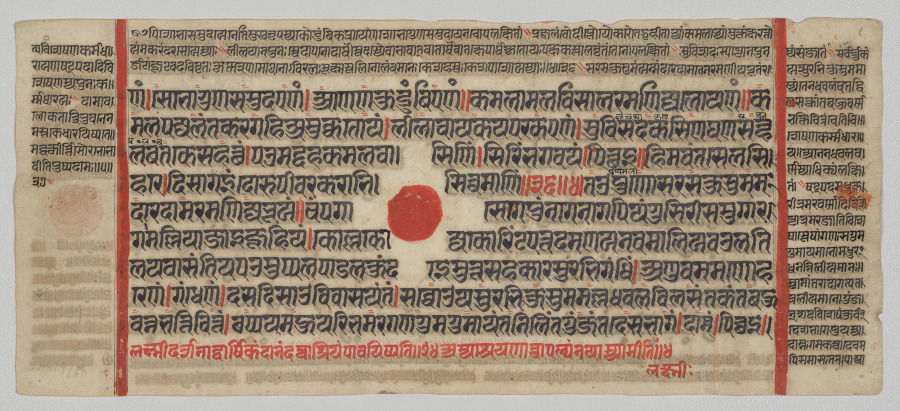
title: Text, Folio 16 (recto), from a Kalpa-sutra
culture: Western India, Gujarat, last quarter of the 15th century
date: c. 1475–1500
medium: Gum tempera, ink, and gold on paper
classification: Painting